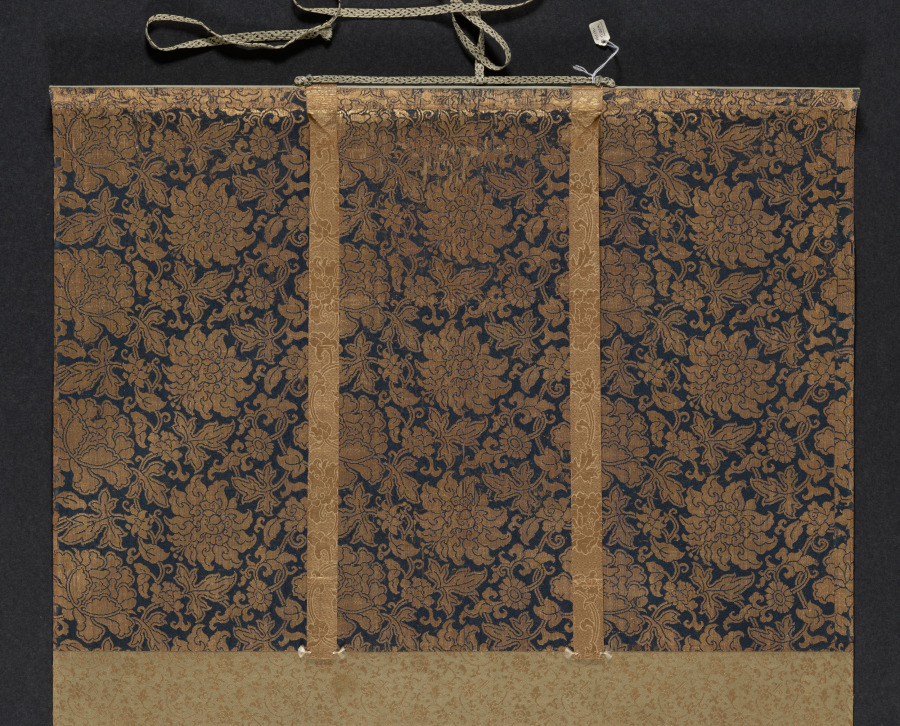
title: Tiger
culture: China, Southern Song dynasty (1127-1279)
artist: Fachang Muqi (Chinese, 1220–1280)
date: c. 1250–79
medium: Hanging scroll; ink and slight color on silk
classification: Painting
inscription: 道有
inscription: 雜華室印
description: The dragon and tiger are tied to the philosophical concept of yin and yang, which describes opposite but complementary forces. The dragon occupies a tiered background of waves and mist. Its luminous head emerges from the darker passages, and its narrow twisting body is serpent-like. By contrast, the close-up view of the tiger emphasizes its bulk. The tiger bends its head to lick its paw while its tail curls in the foreground. In their original Chan Buddhist context, this pair of scrolls likely flanked a central image, like the Bodhisattva Guanyin. The silk has darkened over the centuries, and the slight reddish shading in the tiger’s tongue and nose has faded.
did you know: Fachang Muqi's ink paintings, like this pair, were highly appreciated and collected in Japan.